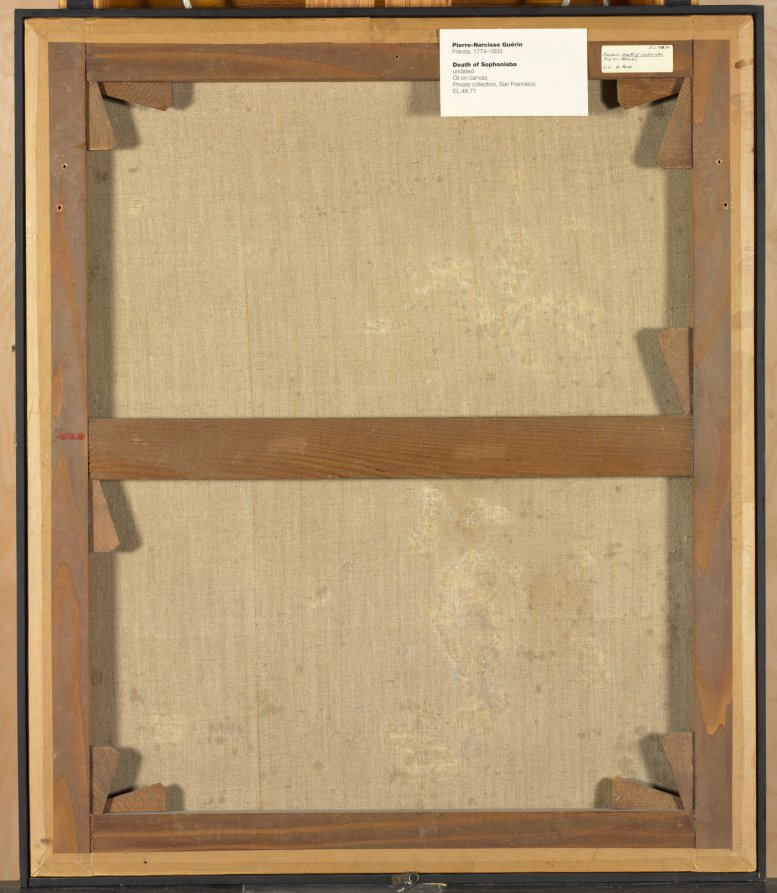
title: The Death of Sophonisba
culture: France, 19th century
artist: attributed to Pierre Guérin (French, 1774–1833)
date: c. 1810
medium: oil on canvas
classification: Painting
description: When a Roman general seized Sophonisba as war booty, her husband encouraged her to die with dignity rather than become a captive. She chose suicide by poison. As depicted in the painting, the toxin has just begun to take effect, and she uneasily maintains composure while penning a suicide note.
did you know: The story of Sophonisba has been an inspiration to artists, writers, and even filmmakers since the 1300s.